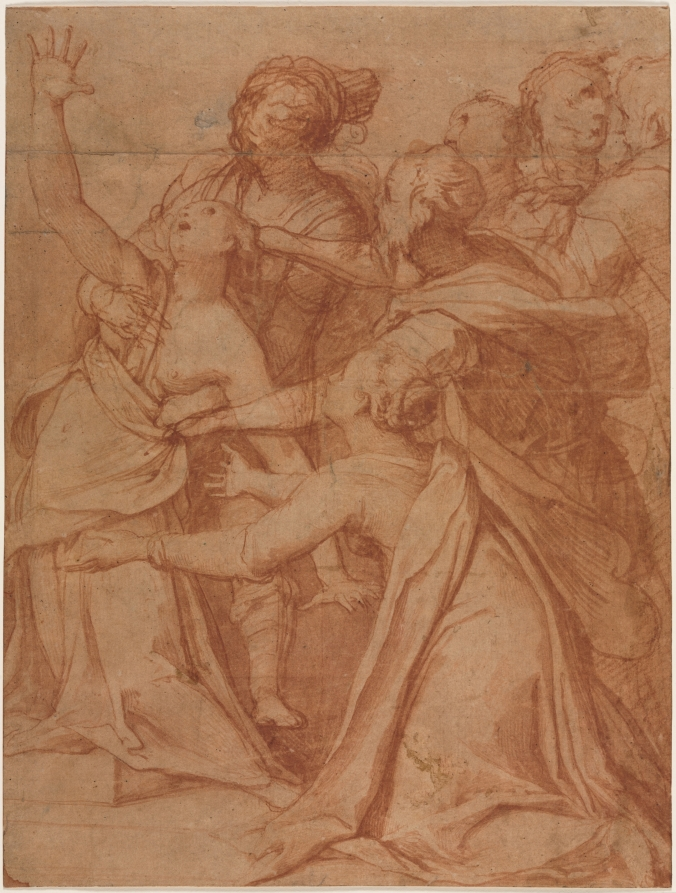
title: A Miracle of Saint Philip Benizzi: The Healing of a Demoniac Woman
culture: Italy, 16th century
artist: Taddeo Zuccaro (Italian, 1529–1566)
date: c. 1557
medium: brush and point of brush and red chalk wash, with red chalk; traces of framing lines in brown ink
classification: Drawing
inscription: VERSO OF SECONDARY SUPPORT, by John Barnard, across center, in brown ink: Domenico Zampieri common ly called [over prior scratched out inscription] / Domenichino was born at Bologna in 1581. H[e] / a Disciple of the Caracci: He died An°. 1641. ; upper left, in graphite: 20ºº ; upper center, in blue pencil: # 50 ; upper right, in blue pencil: 25ºº ; upper left, in red chalk: [£33?] ; lower left, in graphite: 81 [circled; crossed out in blue pencil]